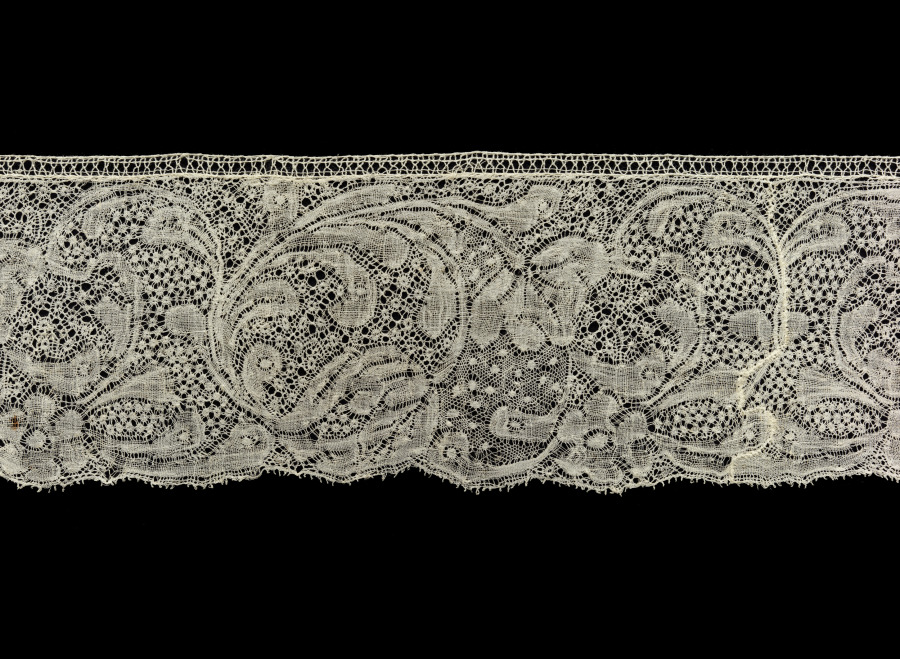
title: Lace Edging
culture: Belgium, Binche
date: 1700s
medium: Linen: bobbin lace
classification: Lace